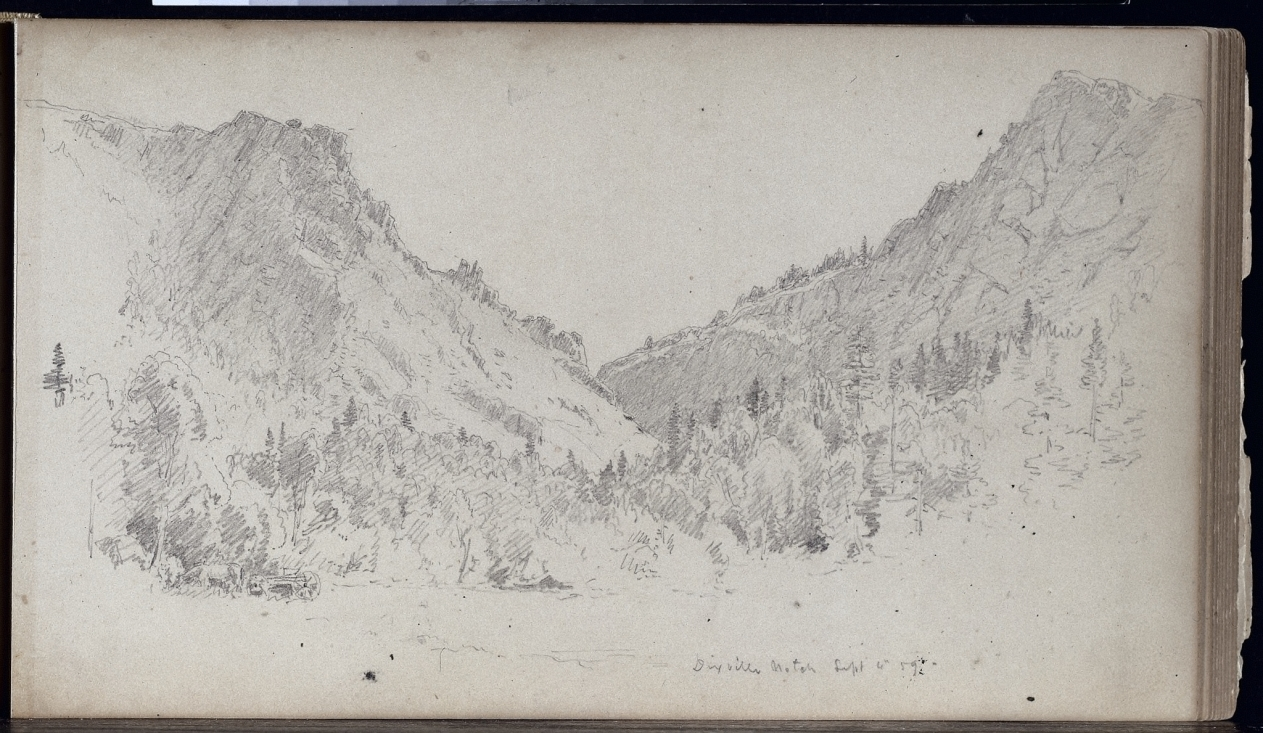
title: Sketchbook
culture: America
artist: Sanford Robinson Gifford (American, 1823–1880)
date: 1859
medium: graphite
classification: Bound Volume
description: Gifford was an American landscape painter belonging to the second generation of Hudson River school artists. Based in New York City with a studio at the Tenth Street Studio Building, Gifford took annual summer trips to the Catskills, the Adirondacks, and other scenic locations in New England. This sketchbook accompanied the artist on his expedition in 1859 to New Hampshire and Maine, where he drew sites such as Dixville Notch, the White Mountains, and Peaks Island, Casco Bay. Gifford used such graphite studies as the basis for oil paintings worked up in his studio, such as A Home in the Wilderness (1866).